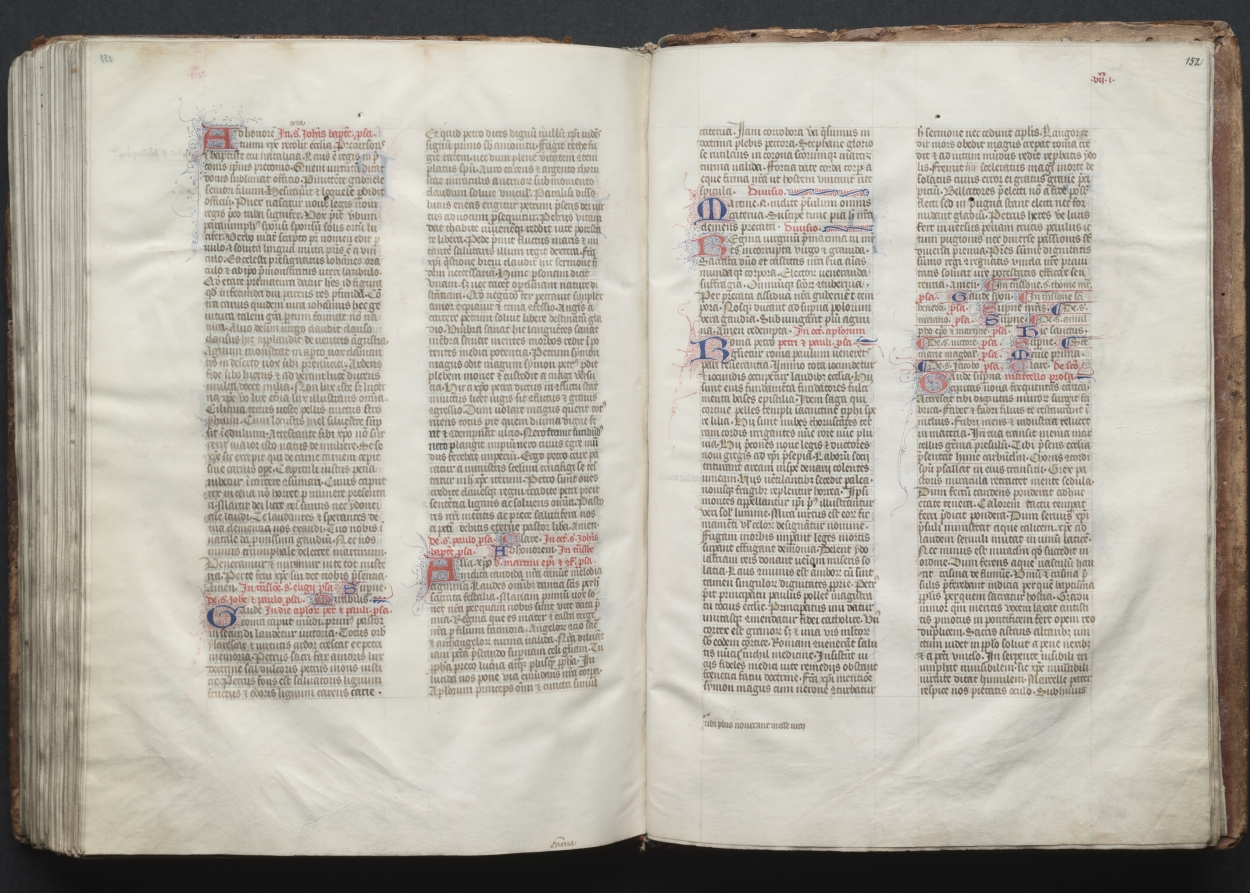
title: The Gotha Missal: Fol. 152r, Text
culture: France, Paris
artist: Master of the Boqueteaux (French)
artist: and Workshop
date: c. 1375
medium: ink, tempera, and gold on vellum; blind-tooled leather binding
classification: Bound Volume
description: The style and quality of this manuscript's decoration is typical of deluxe Parisian books made for aristocratic or royal patrons. Most of the book's decoration appears to be the work of the Master of the Boqueteaux, an artist active at the court of King Charles V (died 1380). His style was apparently shared by a number of book illuminators working in and around Paris. It is very possible that the Gotha Missal belonged to Charles V, but is not provable because the manuscript has no royal portraits and lacks a colophon. Given the book's magnificent decoration, however, it would seem that it was produced for a Valois prince, if not for the king himself. The manuscript receives its name from the German dukes of Gotha, its later owners.